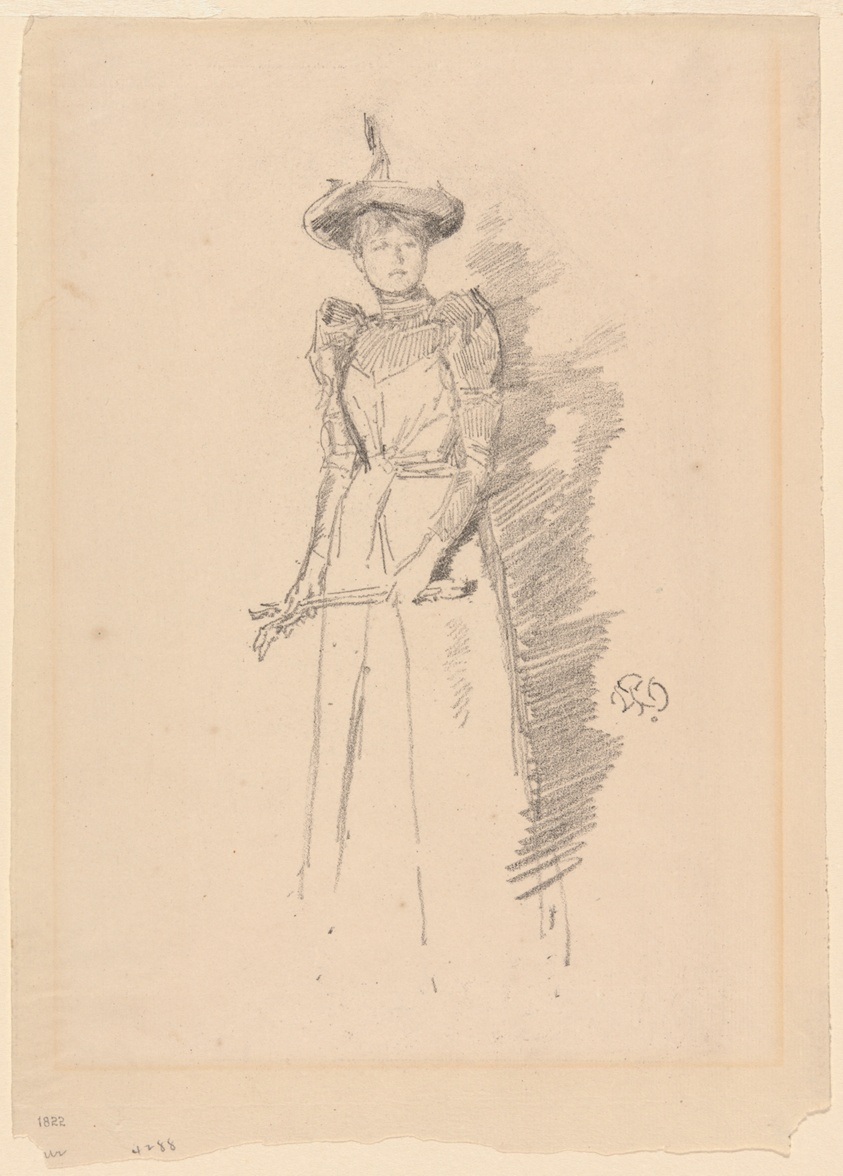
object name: Print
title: Suede Gloves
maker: James McNeill Whistler (American, 1834-1903)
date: 1890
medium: Transfer lithograph in black on cream laid paper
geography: United States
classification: transfer lithograph; lithograph; print; prints and drawing; paper